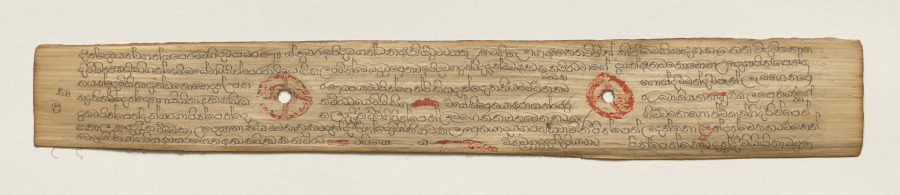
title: Leaf from a Buddhist Manuscript (recto)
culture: Sri Lanka, Singhalese, Late 17th century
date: c. 1700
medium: fiber paper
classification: Manuscript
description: Palm leaf material is still used for manuscripts in Sri Lanka. The palm leaves are prepared first by boiling them, drying them in the sun, and then rubbing them with oils. Scribes then use a metal stylus to incise the text. Then charcoal powder is wiped across the pages, filling in only the inscribed lines.